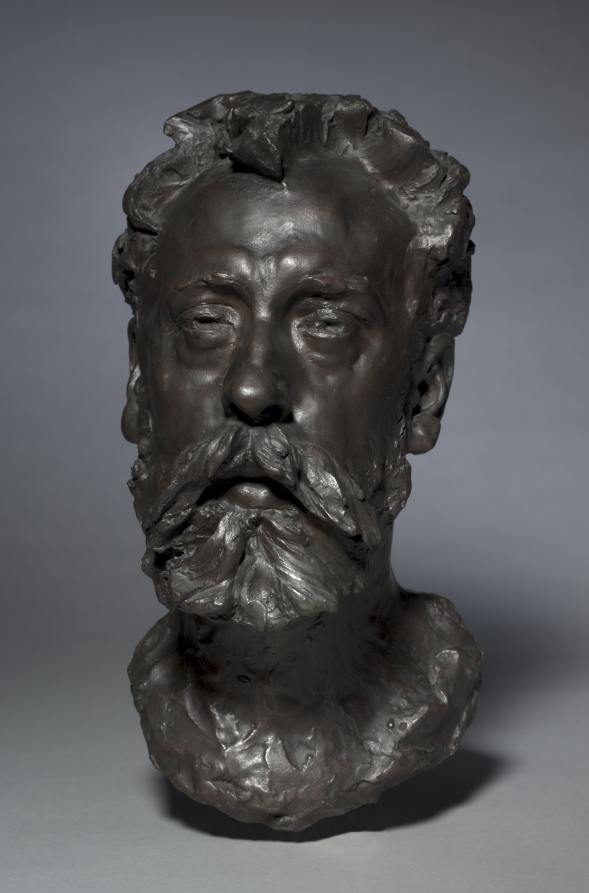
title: Portrait of William E. Henley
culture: France, 19th century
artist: Auguste Rodin (French, 1840–1917)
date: 1882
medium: bronze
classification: Sculpture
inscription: inscribed on back: Rodin.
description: A poet and dramatist, William Henley (1849–1903) was the editor of the British Magazine of Art from 1882 to 1886. He enthusiastically introduced Rodin's sculpture to his readers, even before the artist's work was well known in Paris. To thank him, Rodin made this bust.